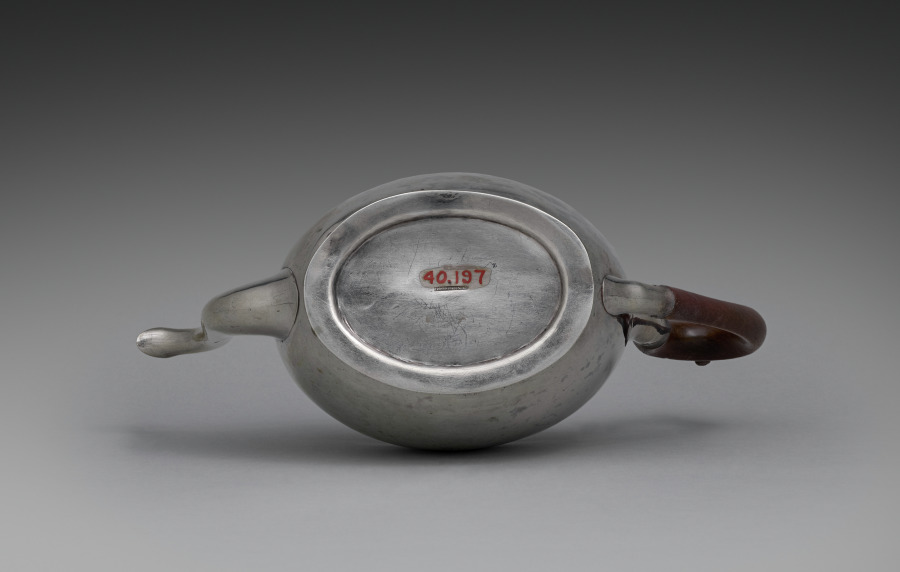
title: Teapot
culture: America, early 19th Century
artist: firm of Henry Farnam (American, 1773–1833)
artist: firm of Rufus Farnam (American, 1771-)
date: c. 1800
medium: silver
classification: Silver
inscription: engraved "AW/to/AW" in bright-cut script on side.